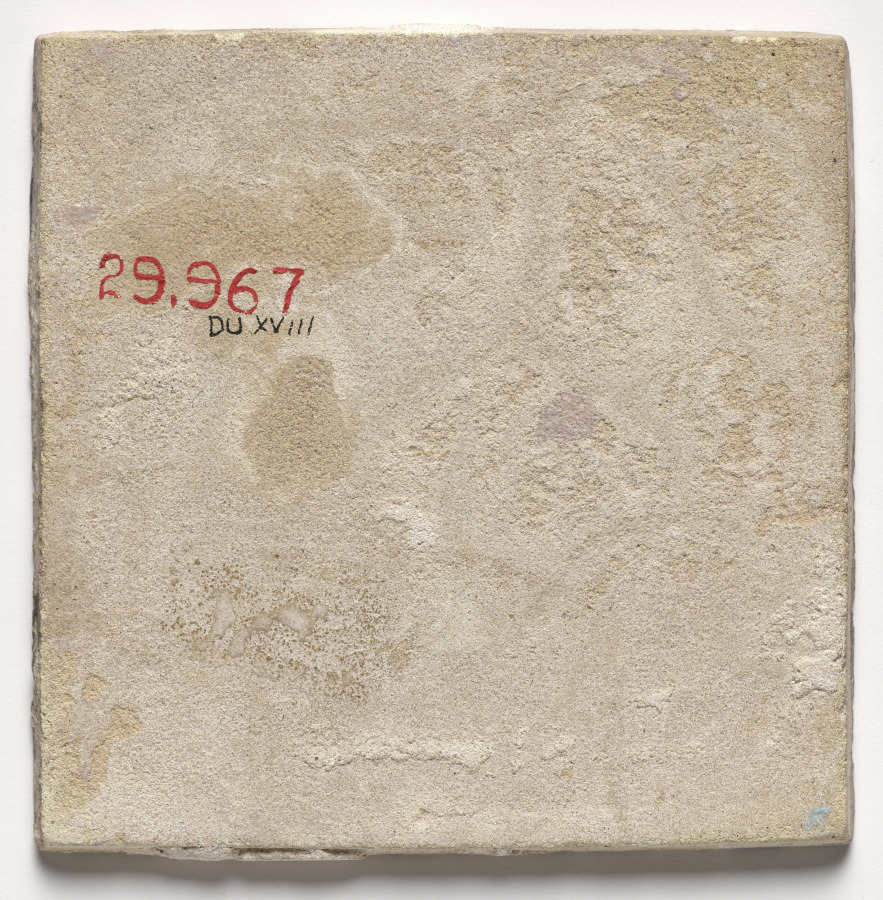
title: Tile- Ship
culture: Netherlands, Holland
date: c 1700s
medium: glazed ceramic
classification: Ceramic